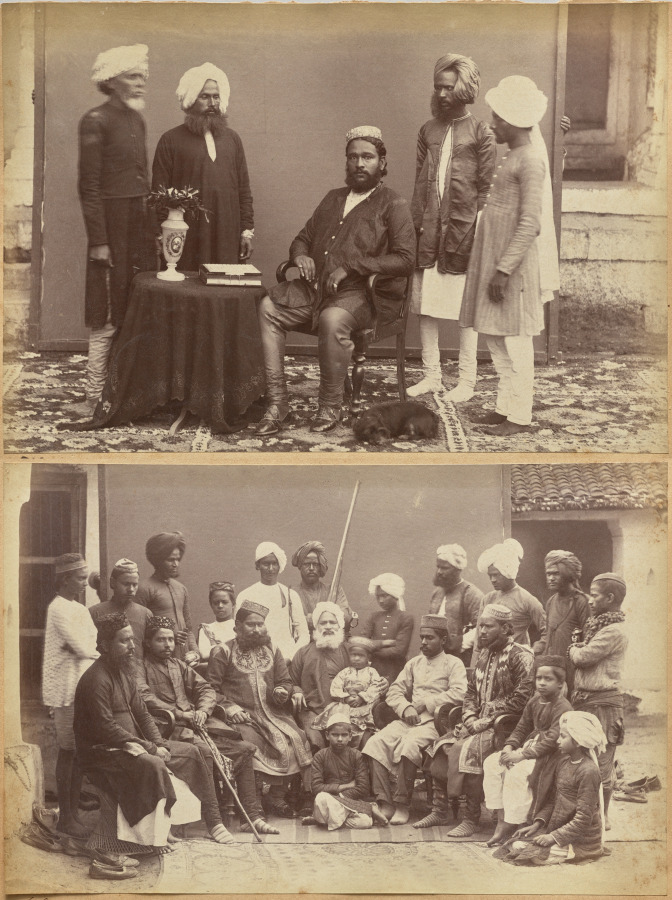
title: Ramkishore Singh, Rewa (recto, top); Mowhri Rahman Alli Khan family, Rewa (recto, bottom)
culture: India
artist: Raja Deen Dayal (Indian, 1844–1905)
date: c. 1882–87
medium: albumen print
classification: Photograph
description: These photographs are part of an album, now disassembled, of around 105 photographs taken in India between 1885 and summer 1887 that provide glimpses into the lives of the British colonial elite and royal and upper-class Indians. The museum holds another group of 37 pictures from this album (2016.266), which was probably commissioned by a British civil servant visiting or working in India around 1888 as a personal souvenir of his experiences there.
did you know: Raja Deen Dayal is regarded now, and was considered during his lifetime, to be India’s most important 19th-century photographer.